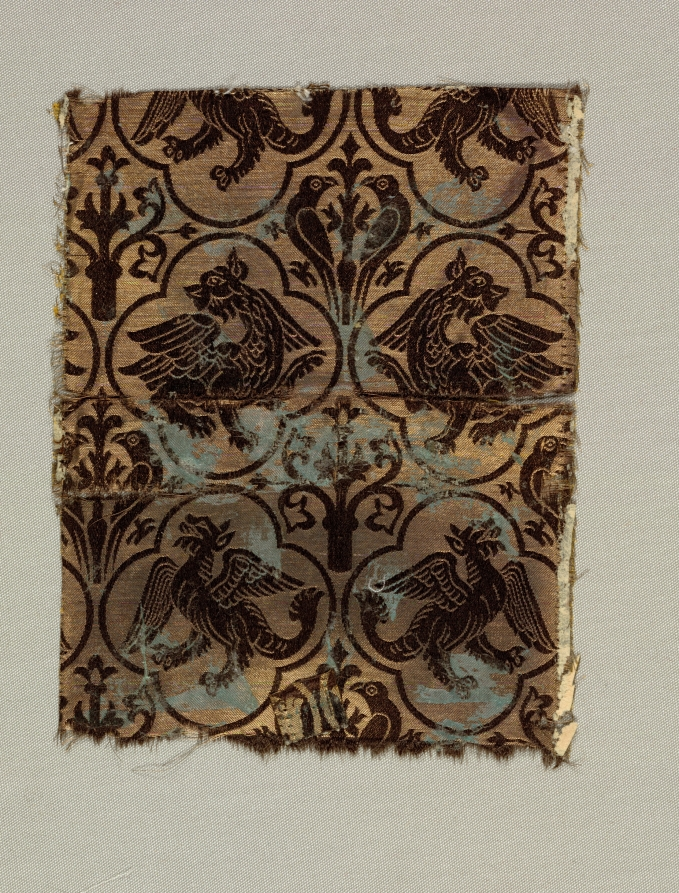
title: Fragment of a Textile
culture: France, early 20th century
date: early 1900s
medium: damask; silk and gold filé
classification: Textile